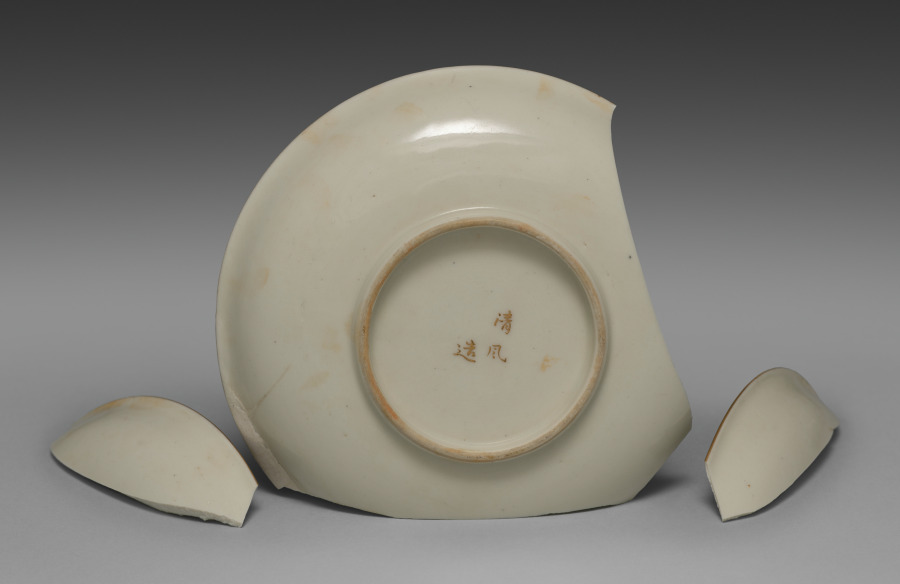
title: Medium-sized Dish from Dining Set with Plum Blossoms and Cracked-Ice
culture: Japan, Meiji period (1868–1912)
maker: Seifū Yohei II (Japanese, 1844–1878)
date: c. 1875–78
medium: Porcelain with molded designs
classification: Ceramic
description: Each item in this set has a delicate low-relief design of flowering plum branches over scattered, intersecting lines meant to resemble the cracked-ice surface of a frozen body of water and is signed on the base in gold pigment. While Yohei II produced many fine works in underglaze blue, like those produced by Kiyomizu Shichibei, he also made works in quite different styles later in his career, from the early 1870 s. In 1873, he was appointed purveyor to the Industrial Center of Kyoto Prefecture, a designation associated with Kyoto’s efforts to reach an international market through the port of Kobe; and from 1875 until his death, he was involved in national-level projects to present Japanese ceramics across the world. It was during this period that Yohei III was apprenticed to Yohei II, and it has been suggested that this set may in fact be an early example of Yohei III’s work, which he signed with his teacher’s name. Decorated with flowers resembling Japanese textile motifs, the set calls to mind the design of Yohei II’s pair of vases with plum blossoms in the Victoria and Albert Museum. Here, the elaborate trees created for a formal public exhibition setting have been translated into the approachable blossoms of the genteel domestic environment. While the designs are consistent across the pieces, each raised flower petal and pistil and each incised line in the ice was done by hand, so the cups, bowls, and dishes are similar yet unique. The bottoms of two boxes once identified the set’s owner, but the information has been deliberately obscured with black ink. However, inscriptions still visible appear to indicate two occasions, once at the end of July 1886 , and once again in June 1916 , when parts of the set were requested from Hokura in Niigata Prefecture. The location corresponds to a neighborhood in the present-day city of Jōetsu. The surname Tsuji 辻 also appears on a paper tag affixed to one of the box cloths. Future research may possibly reveal more about their provenance. A vase by Yohei III in a private collection combines the formal grandeur of the Yohei II vases in the Victoria and Albert Museum with the gentler design of this dining set, placing flowering plum trees against soft, scalloped-edge clouds resembling those in golden screens.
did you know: The dining wares have a creamy white coloration that the four boxes containing them identify as Korean in style.